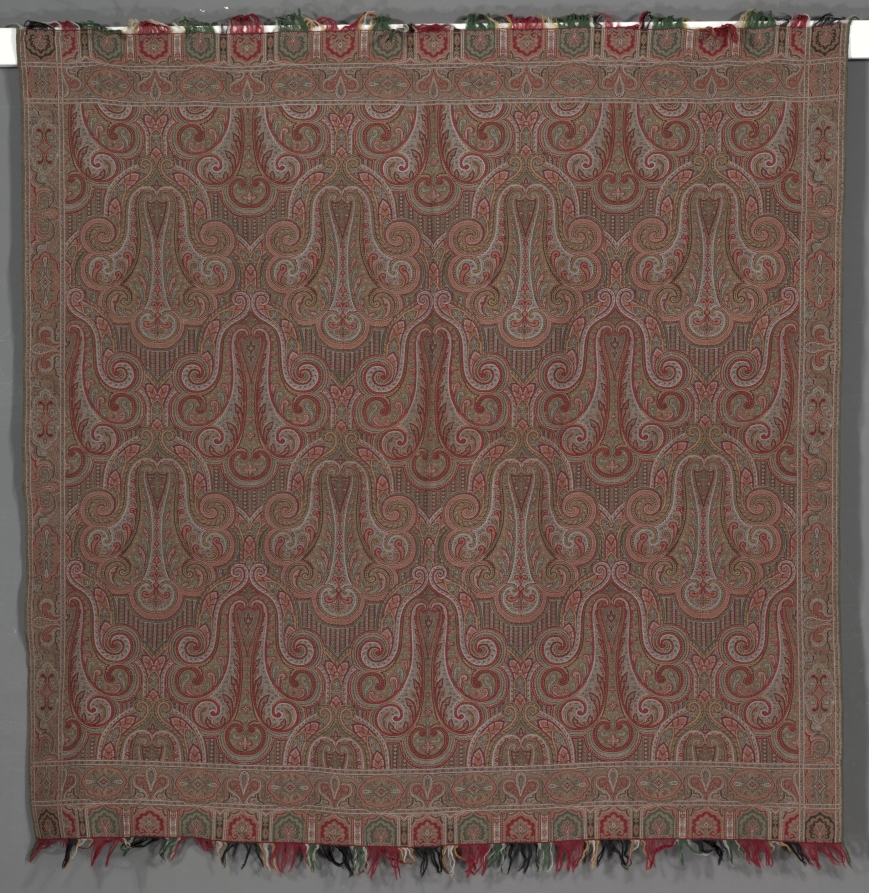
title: Square Reversible Shawl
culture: England, Norwich or France, Lyon or Scotland, Paisley, second half of 19th century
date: c. 1865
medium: cotton and wool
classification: Textile